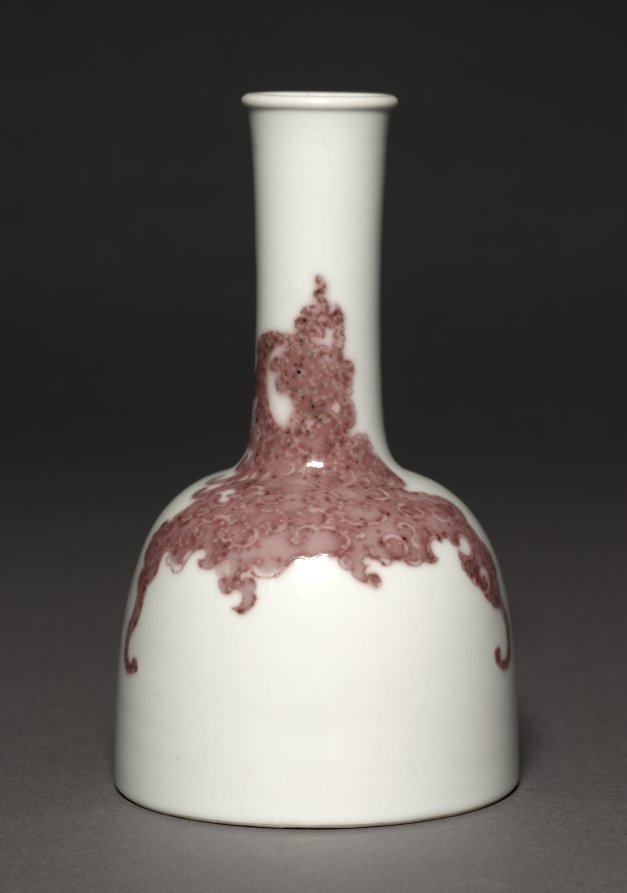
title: Mallet-Shaped Bottle with Phoenixes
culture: China, Jiangxi province, Jingdezhen, Qing dynasty (1644-1911), Kangxi mark and period (1662-1722)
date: 1662–1722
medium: porcelain with underglaze red (and green) decoration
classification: Ceramic